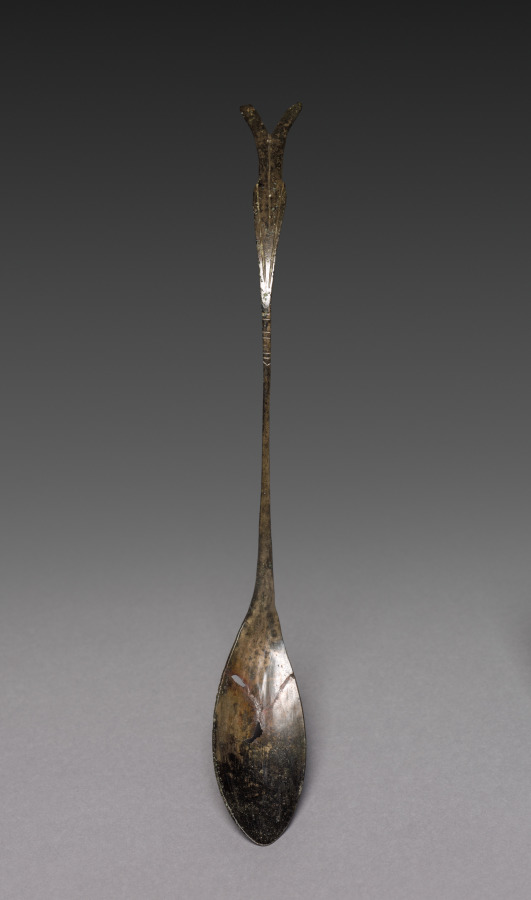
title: Spoon with Fish-Tail Design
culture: Korea, Goryeo dynasty (918–1392)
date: 918–1392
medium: silver bronze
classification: Metalwork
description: Many of Goryeo period spoons like this one feature a curved handle that splits into a jagged fishtail design. This fishtail design is not unique to Korea; it was also widely used in the area under the rule of two non-Han Chinese states: Liao (907–1125) and Jin (1115–1234). These seemingly ordinary objects testify to exciting material interactions between the Goryeo dynasty and non-Han Chinese northern states, which were often omitted from the official records.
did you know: Bronze spoons are the most common burial item. Scholars have proposed that toward the end of the 1300s, Koreans enjoyed meat-based soups more than any other dishes, explaining why spoons became common household items as well as burial goods.